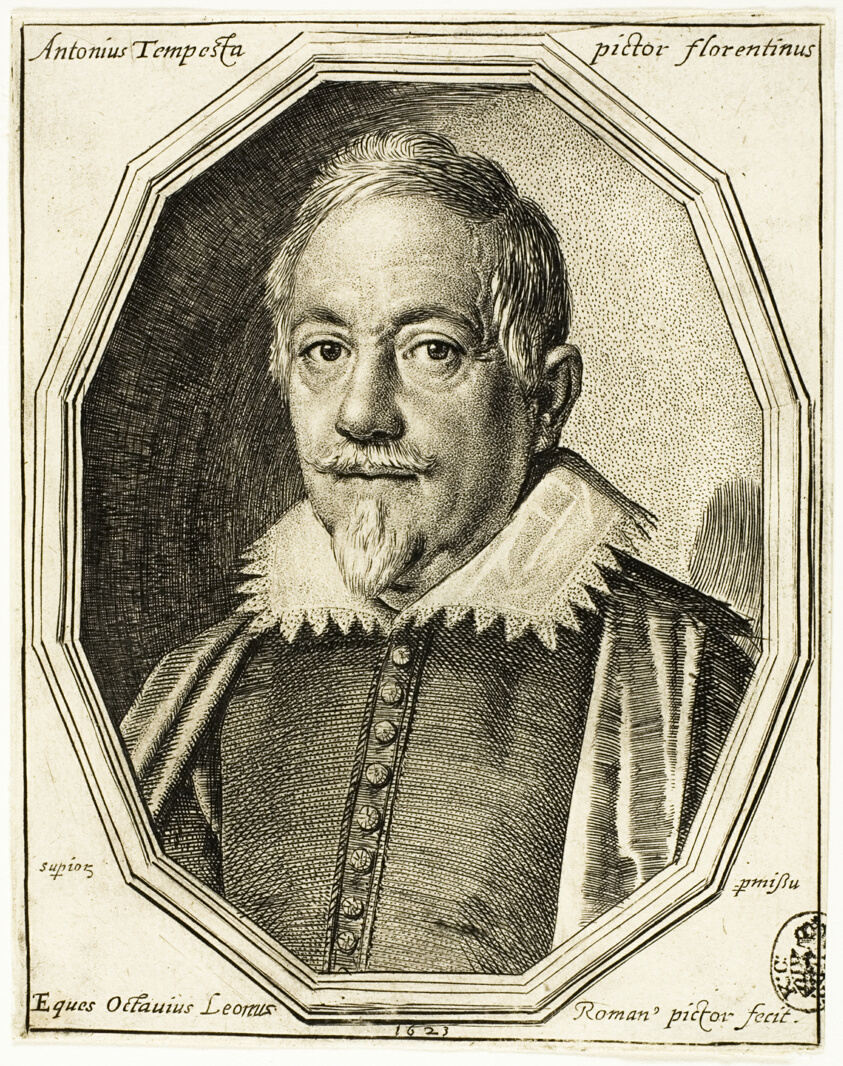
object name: Print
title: Antonius Tempesta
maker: Ottavio Mario Leoni; Italian, 1578-1630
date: 1623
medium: Engraving on paper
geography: Italy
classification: etching; print; prints and drawing